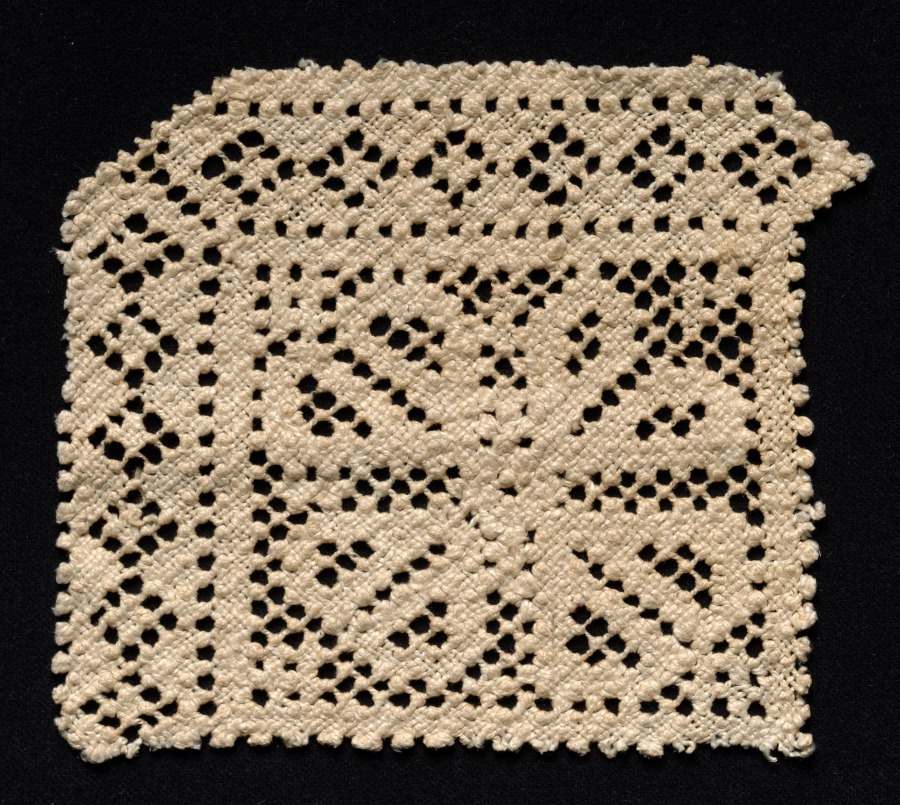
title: Fragment of a Corner with Floral Motif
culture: Spain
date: 1600s–1700s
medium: Bleached linen (est.): needle lace, filet/lacis (knotted ground and darned in two directions)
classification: Lace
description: Though this fragment of lace is completed in the filet/lacis technique, the floral motif imitates a form of needle lace particular to Spain known as Ruedas or Sol Lace, due to its radial patterns.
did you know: Myrta Leonora Jones, the donor of this work, was a women’s rights activist in Cleveland in the early 20th century.